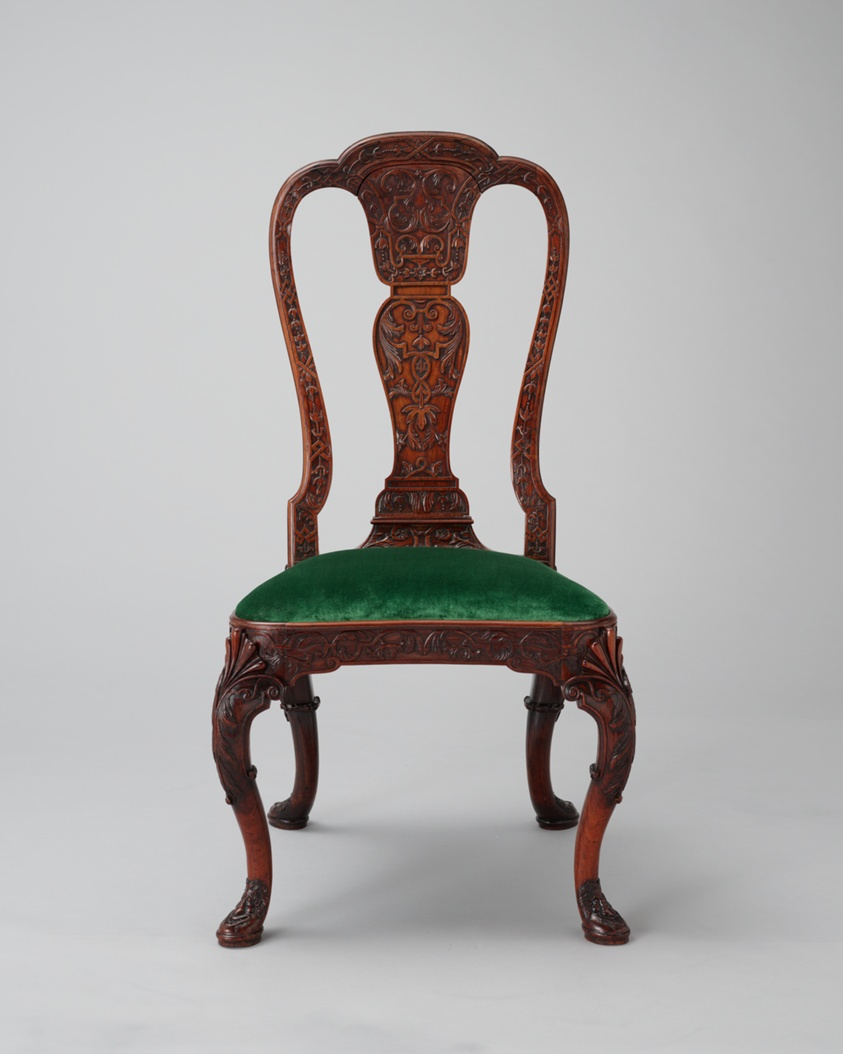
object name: Furniture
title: Chair (one of a pair)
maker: Chinese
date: c. 1730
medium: Padauk wood with textile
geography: China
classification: furniture; european decorative arts; chair